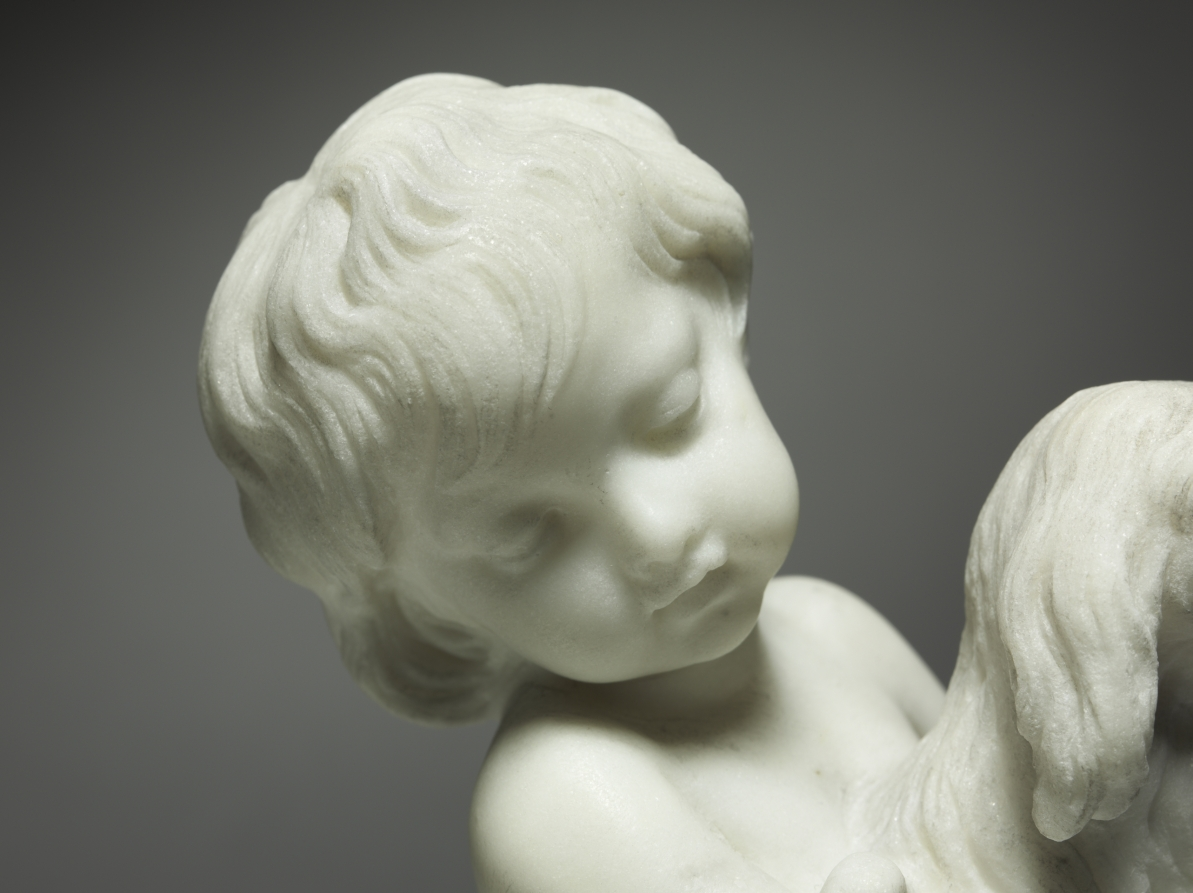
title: Faithful Love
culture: France, 19th century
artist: after Augustin Pajou (French, 1730–1809)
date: 1800s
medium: marble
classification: Sculpture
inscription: signature behind stump with roses: Pajou f(ecit) 1787.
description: These statuettes represent the opposing spectrums of love—fickle and faithful—both portrayed by Cupid. Fickle Love absent-mindedly plays with a butterfly, a symbol of the fleeting moment. Conversely, Faithful Love is accompanied by a dog, the ultimate loyal companion. These works were originally believed to be by the hand of Augustin Pajou, because the works are signed and he made nearly identical sculptures. However, due to the slightly clumsy execution and the awkward scale of the signatures, the museum now believes the statuettes were created by another artist after Pajou's design.